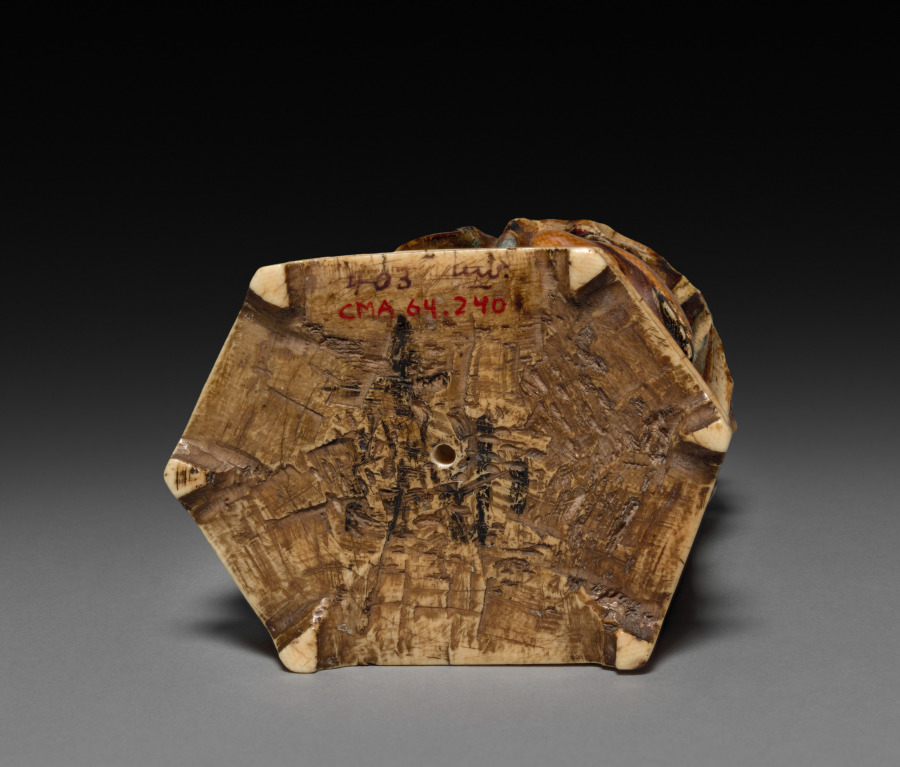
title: Female Figure with Crane and Squirrel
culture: China, Qing dynasty (1644-1911), Kangxi reign (1662-1722)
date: 1662–1722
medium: ivory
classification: Ivory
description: In the Qing dynasty (1644–1911), luxury items became more affordable to larger parts of the society, including women, merchants, and literati in non-official positions. Imperial patronage and a growing urban population encouraged consumption of luxury goods and local craftmanship. This ivory form of a woman with a crane illustrates the superb skills and the creative mind of the talented artisan who sought clients on a competitive market.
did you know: The ivory has aged to a rich amber, while traces of its original red and green paint remain on the woman’s cuffs and collar.